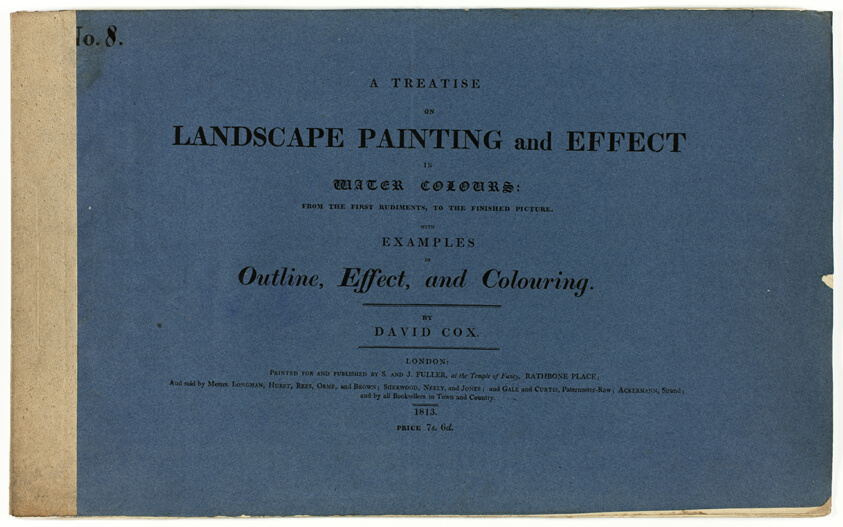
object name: Book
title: A Treatise on Landscape Painting and Effect in Water Colours: From the First Rudiments, to the Finished Picture No. 8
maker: David Cox, the elder (English, 1783-1859); engraved by Richard Reeve (English, 1780-c. 1835); published by S. and J. Fuller (English, 19th century)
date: 1813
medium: Book with four aquatints and letterpress in black on cream wove paper, in box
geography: England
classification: book; paper; prints and drawing